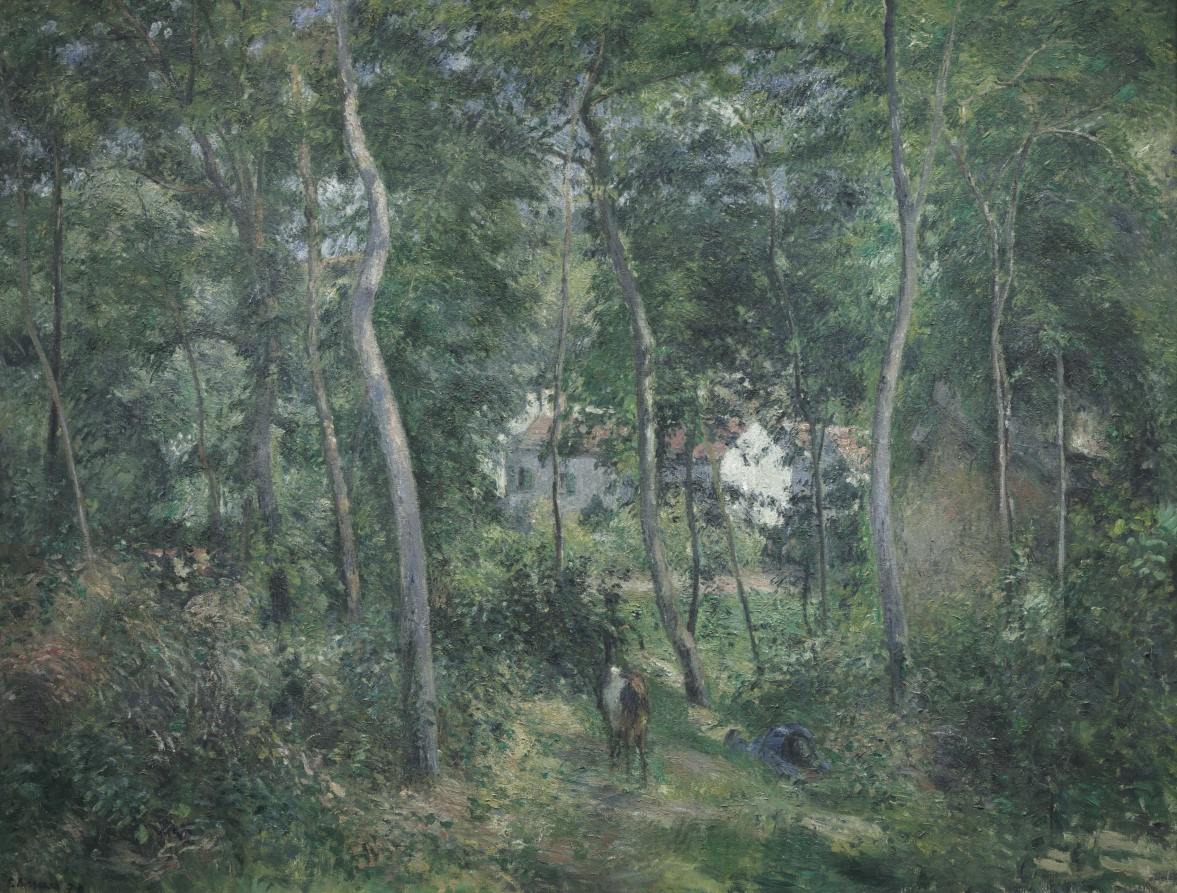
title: Edge of the Woods Near L'Hermitage, Pontoise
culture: France, 19th century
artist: Camille Pissarro (French, 1830–1903)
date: 1879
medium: oil on fabric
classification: Painting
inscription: Signed lower left: C. Pissarro 79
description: Born to a French-Jewish family on St. Thomas island in the Caribbean, Pissarro painted this monumental landscape when he was desperately poor and struggling to sell his paintings. It depicts a man slumbering in the sun-dappled backwoods of the Hermitage, a rural village near Pontoise, where the artist had been living since 1872. Restricting his palette to pure hues, Pissarro applied brushstrokes in systematic diagonal patterns, producing an effect that he likened to knitting. This canvas was included in the fourth Impressionist exhibition of 1879.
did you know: A goat seen from the back standing next to the figure in blue laying in the grass invites the viewer to step inside this serene and beautiful setting.